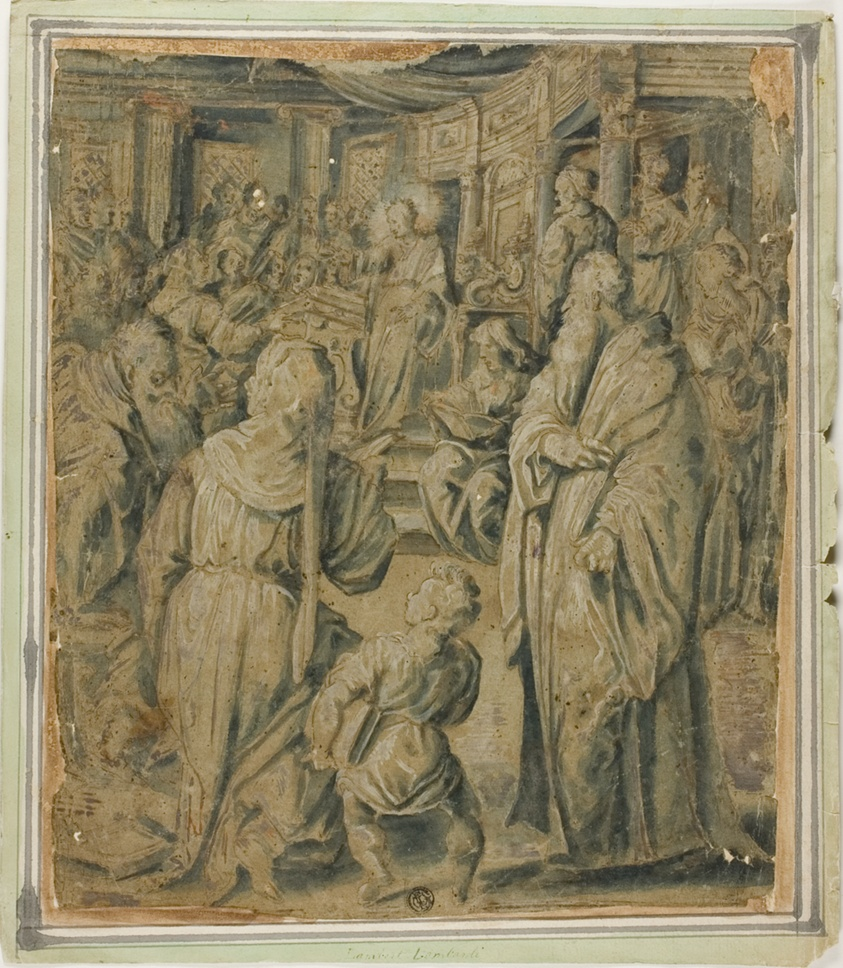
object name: Drawing and Watercolor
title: Christ Among the Doctors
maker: School of Lambert Lombard (Flemish, 1506-1566)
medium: Pen and brown ink and brush and blue wash, heightened with lead white (partly discolored), on blue laid paper (faded), laid down on ivory laid paper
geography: Flanders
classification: chalk; drawings (visual works); prints and drawing